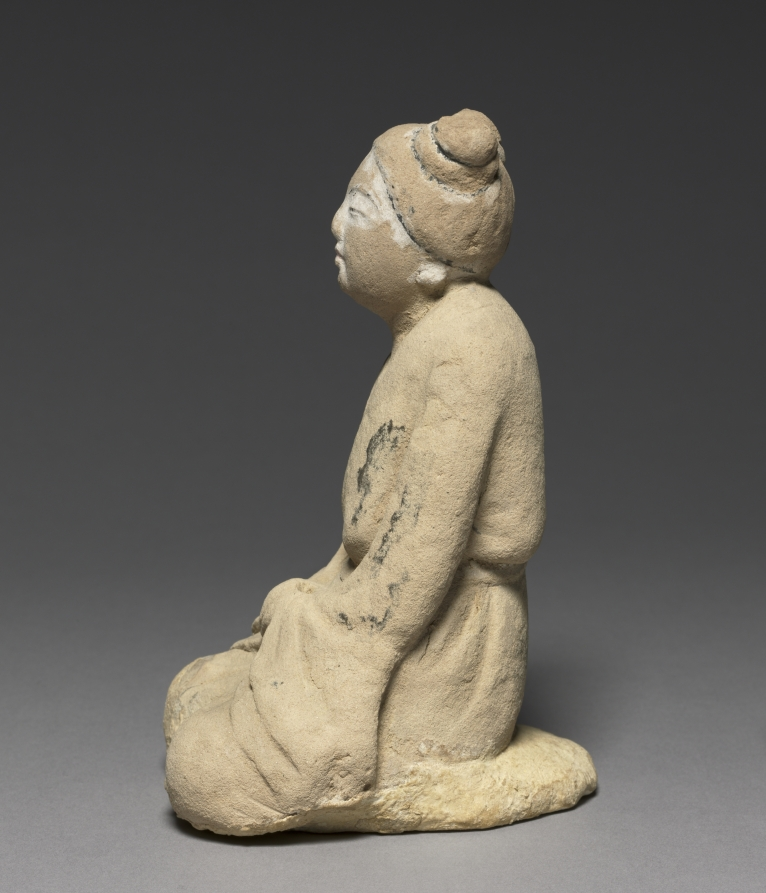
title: Woman from an Audience Scene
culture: Japan, Asuka period (538-710) to Nara period (710-94)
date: mid-600s to early 700s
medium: unfired clay with color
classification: Sculpture